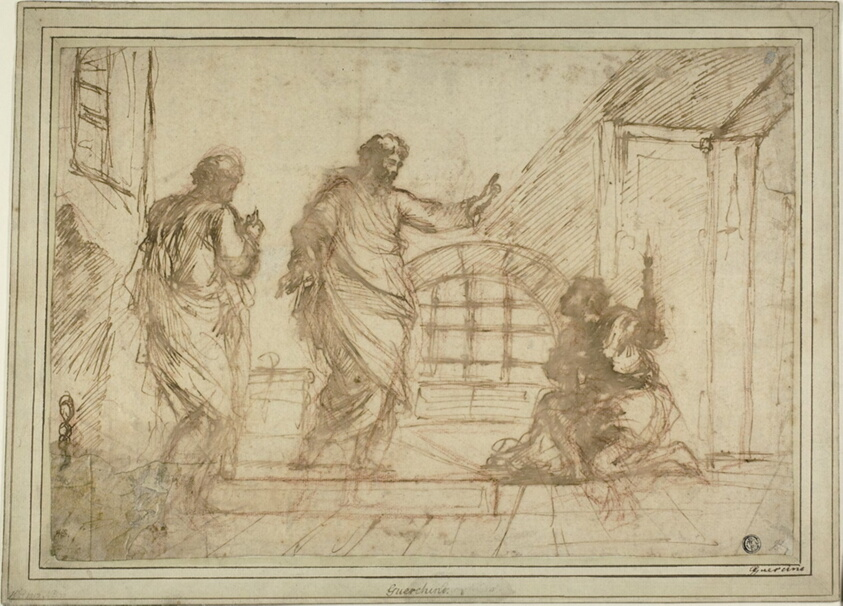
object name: Drawing and Watercolor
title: Saint Paul and the Jailer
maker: Unknown Artist; Italian, 17th century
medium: Pen and brown ink, with brush and brown wash and red chalk, on ivory laid paper, laid down on ivory laid card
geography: Italy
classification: drawings (visual works); prints and drawing